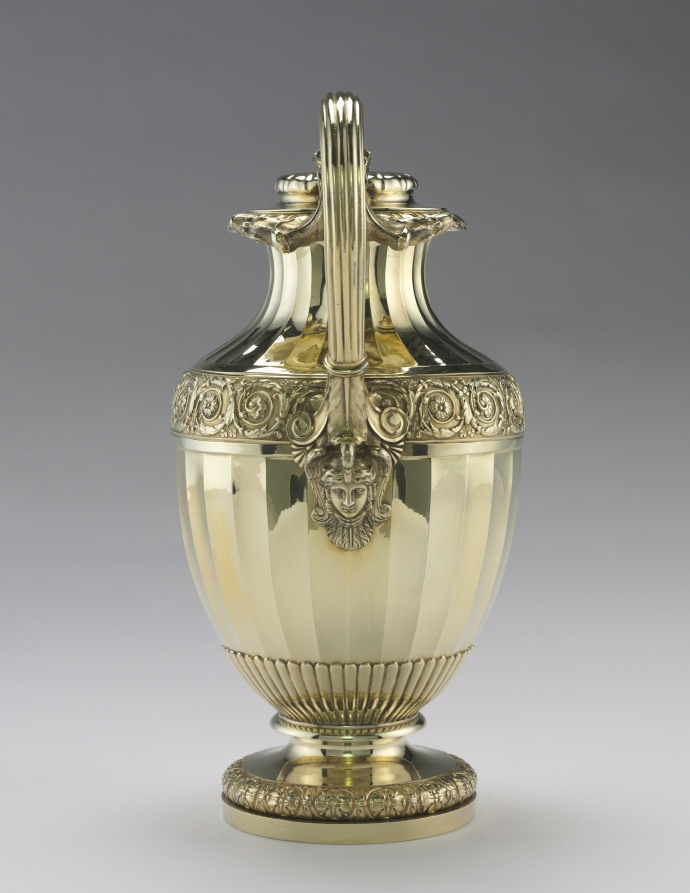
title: Wine Ewer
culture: England, London, 19th century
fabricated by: Paul Storr (British, 1771–1844)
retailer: Rundell, Bridge and Rundell (British, 1797–1834)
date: 1815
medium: silver gilt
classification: Silver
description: Silver was firmly established as a symbol of wealth, status, and power by the 1800s. Throughout history, styles largely followed the taste of the reigning monarch and thus reflected the political and social alliances that underpinned the aristocracy in Britain. The frieze of scrolls surrounding the handle, the acanthus leaf supporting the lip, and the dolphin heads framing the hinge on this ewer are characteristic of a bolder expression of classical taste favored during the Regency period (1811–20).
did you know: The vine-leaf border along the top of this ewer was inspired by Roman silver from antiquity and popularized by Paul Storr in the 1800s.